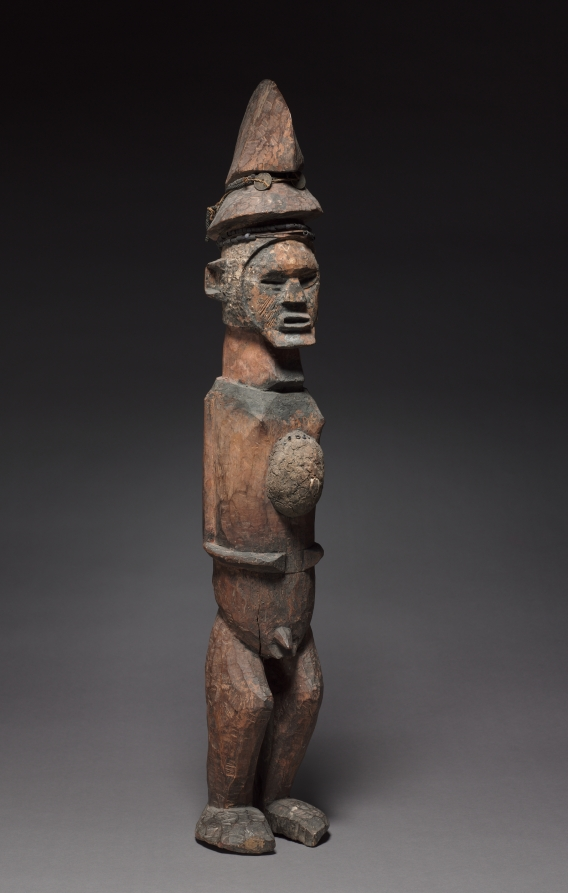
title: Male Figure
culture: Africa, Central Africa, Republic of the Congo (most likely) or Democratic Republic of the Congo, Teke-style maker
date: late 1800s-early 1900s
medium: Wood, resin, iron, copper, plant fiber, cloth, glass beads, coins, antelope horns, and cowrie shells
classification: Sculpture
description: This exceptionally large Teke figure is well preserved and holds a medicine package partly buried in an abdominal cavity. Its size suggests that it stood at the service of a larger group of people and that its powers extended beyond the limits of a village. Its scarification marks and beard identify it as representing a chief or another dignitary.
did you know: The coins on the figure’s hat were those used in the Belgian Congo.